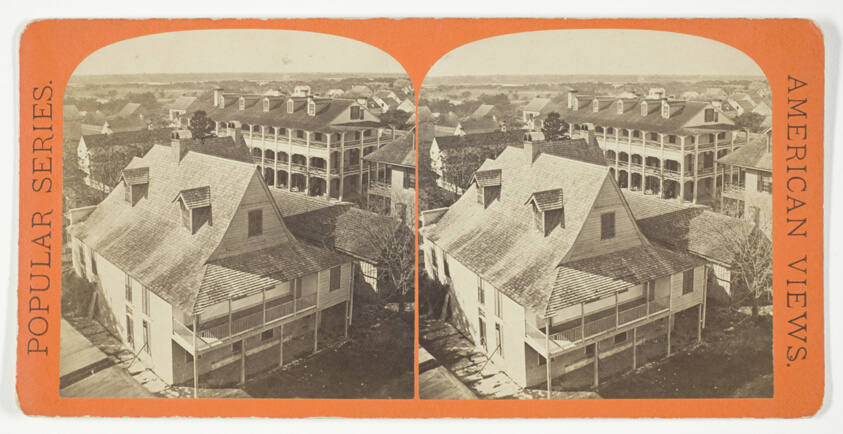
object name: Photograph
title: Panorama from Florida House, Looking North West, No. 9646'47 from the series "Views in St. Augustine, Florida"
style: 19th century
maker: Anthony & Company; American, active 1848–1901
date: 1869/1901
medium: Albumen print, stereo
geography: United States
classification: stereograph (albumen); albumen silver print; photographic process; photography; photograph